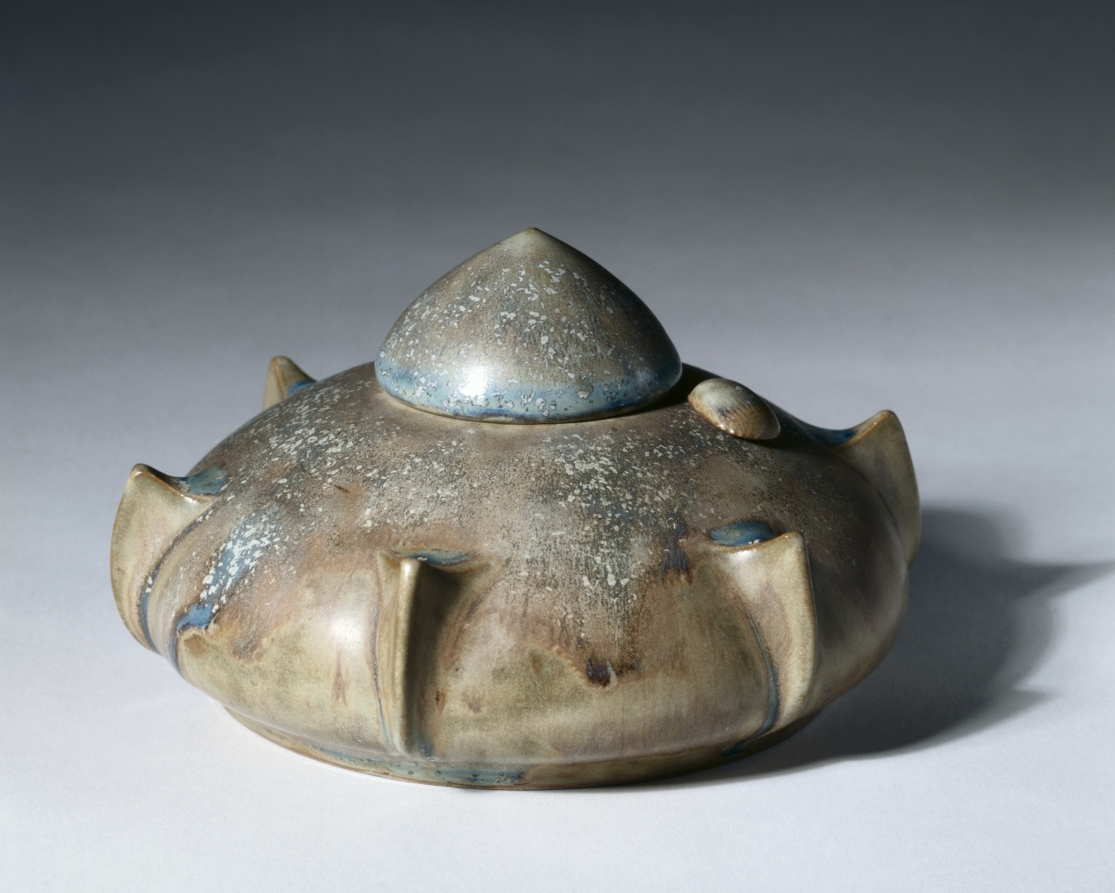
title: Inkwell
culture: France, Sèvres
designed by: Alexandre Sandier (French, 1843–1916)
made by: Sèvres Porcelain Factory (French, est. 1756)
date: 1903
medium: stoneware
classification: Ceramic